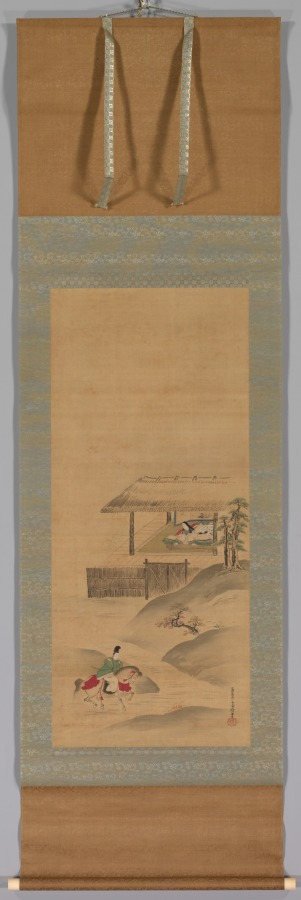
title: Minamoto no Nakakuni Visits Lady Kogō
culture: Japan, Edo period (1615–1868)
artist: Kiyohara Yukinobu (Japanese, 1643–1682)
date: late 1600s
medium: One of a triptych of hanging scrolls; ink and color on silk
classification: Painting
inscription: 款記「清原氏女雪信筆」/「清原女」朱文八角印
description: Kiyohara Yukinobu was one of Japan's earliest and most talented female painters. Kiyohara preferred Japanese style painting techniques and subjects. Her work depicts the scenery and history of her native land. In addition to the tonalities of ink, she applied a delicate range of colors. These help identify the seasons, an important theme in Japanese life and culture.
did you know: This central painting from a triptych presents an episode from The Tale of the Heike in which Minamoto no Nakakuni is sent by the emperor to look for Lady Kogō.